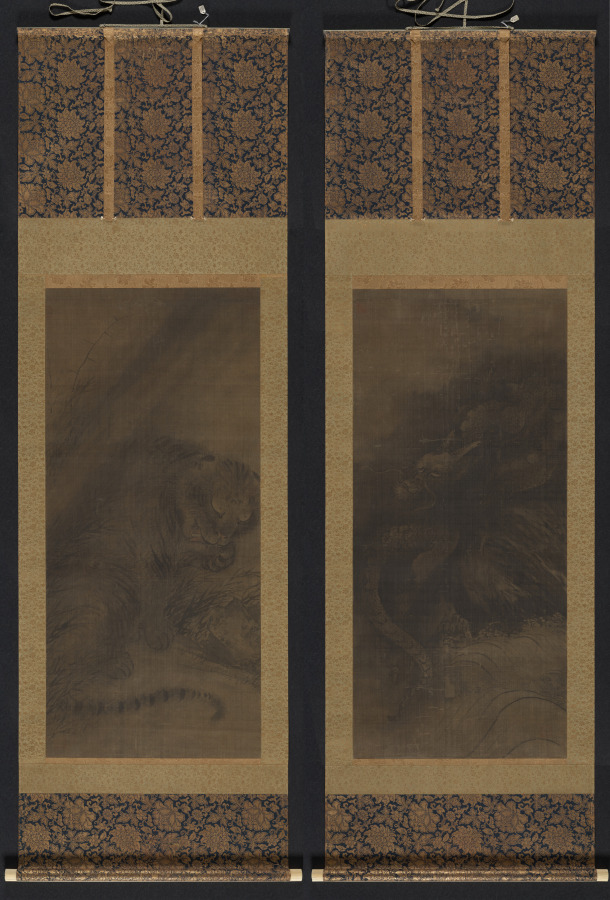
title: Dragon; Tiger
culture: China, Southern Song dynasty (1127-1279)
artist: Fachang Muqi (Chinese, 1220–1280)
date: c. 1250–79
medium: Pair of hanging scrolls; ink on silk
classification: Painting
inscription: 道有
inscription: 雜華室印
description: The dragon and tiger are tied to the philosophical concept of yin and yang, which describes opposite but complementary forces. The dragon occupies a tiered background of waves and mist. Its luminous head emerges from the darker passages, and its narrow twisting body is serpent-like. By contrast, the close-up view of the tiger emphasizes its bulk. The tiger bends its head to lick its paw while its tail curls in the foreground. In their original Chan Buddhist context, this pair of scrolls likely flanked a central image, like the Bodhisattva Guanyin. The silk has darkened over the centuries, and the slight reddish shading in the tiger’s tongue and nose has faded.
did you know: Fachang Muqi's ink paintings on Chan (or Zen in Japanese) themes were very popular in Japan.